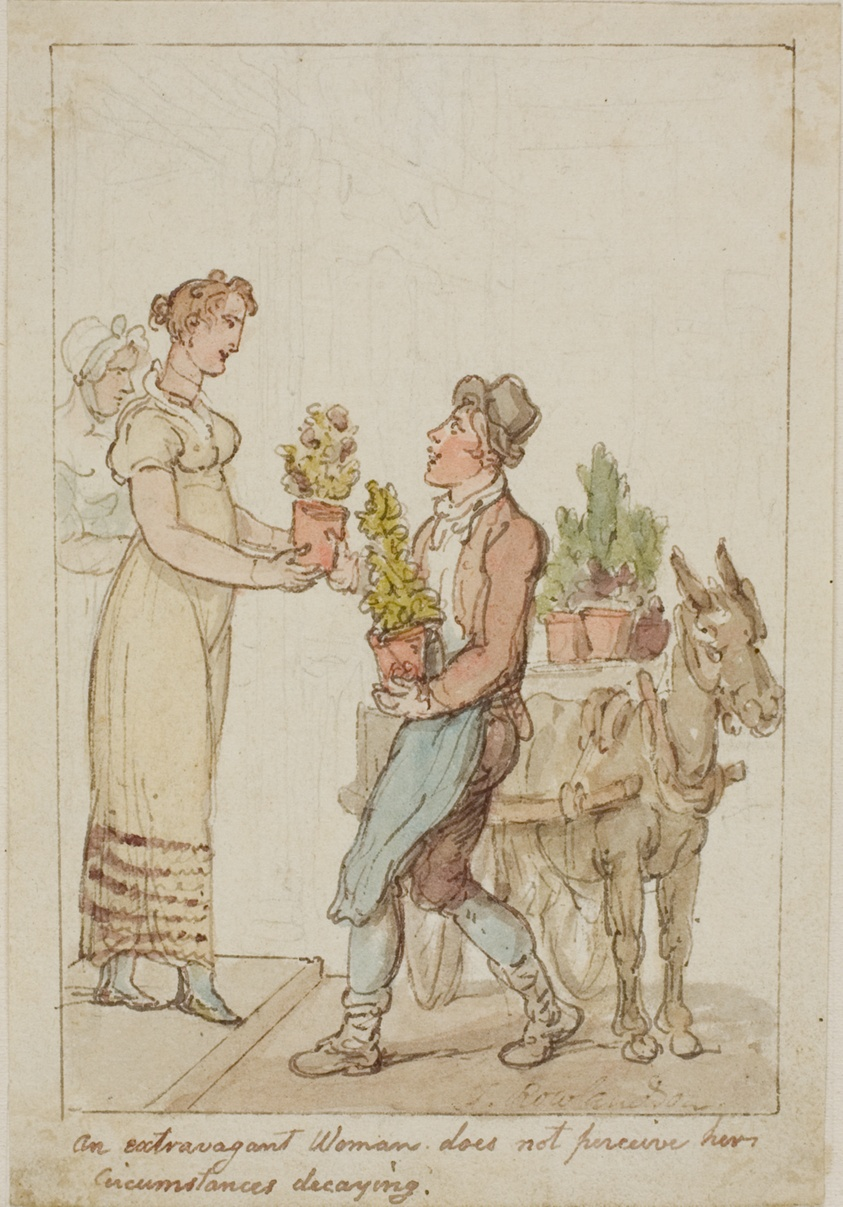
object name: Drawing and Watercolor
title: The Extravagant Woman Does Not Perceive Her Circumstances Decaying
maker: Thomas Rowlandson (English, 1756-1827)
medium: Pen and brown ink with brush and watercolor, over graphite, on ivory wove paper, tipped onto ivory wove paper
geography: England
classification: watercolor; drawings (visual works); prints and drawing